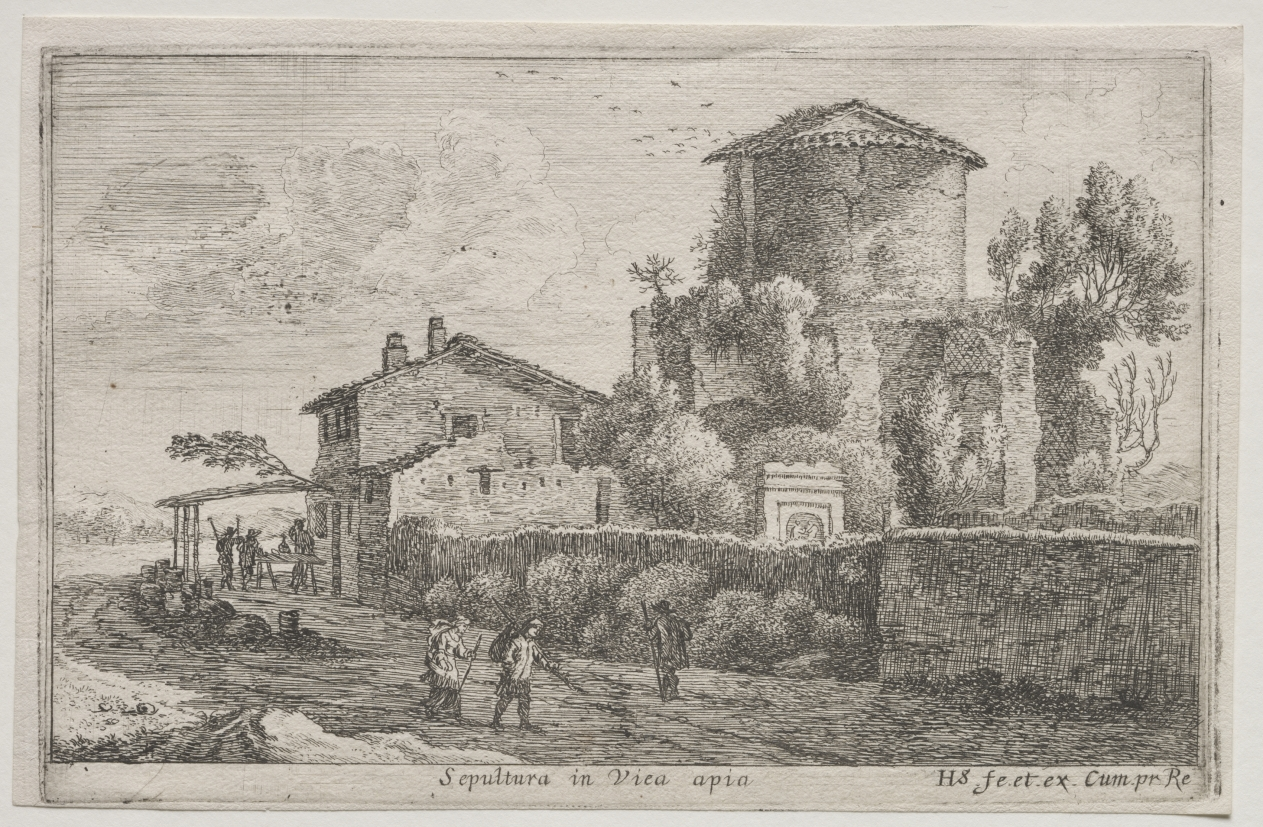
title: Diverse Views in and around Rome: Tomb along the Appian Way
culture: Netherlands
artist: Herman van Swanevelt (Dutch, c. 1600–1655)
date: 1653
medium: etching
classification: Print